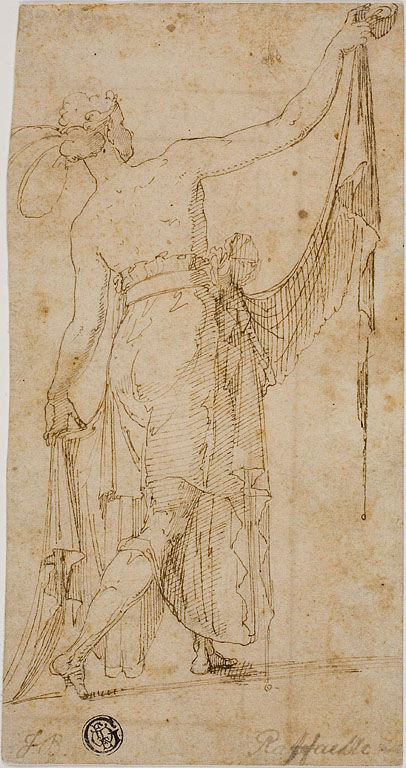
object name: Drawing and Watercolor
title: Draped Standing Figure with Outstretched Arms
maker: Unknown Artist; Italian, mid-16th century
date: 1540/50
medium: Pen and brown ink on cream laid paper, laid down on buff laid paper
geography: Italy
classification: pen and ink drawings; drawings (visual works); prints and drawing